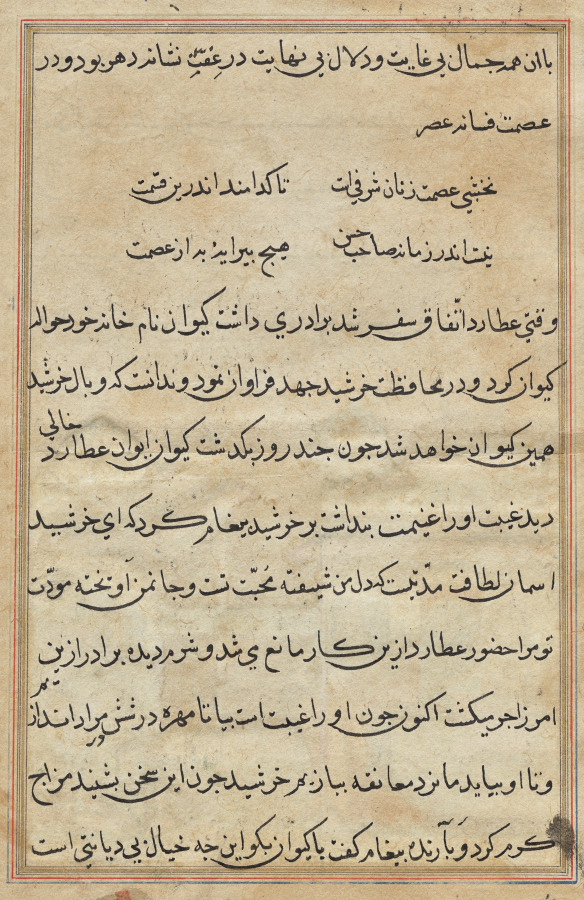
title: Page from Tales of a Parrot (Tuti-nama): text page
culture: Mughal India, court of Akbar (reigned 1556–1605)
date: c. 1560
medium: gum tempera, ink, and gold on paper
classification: Painting